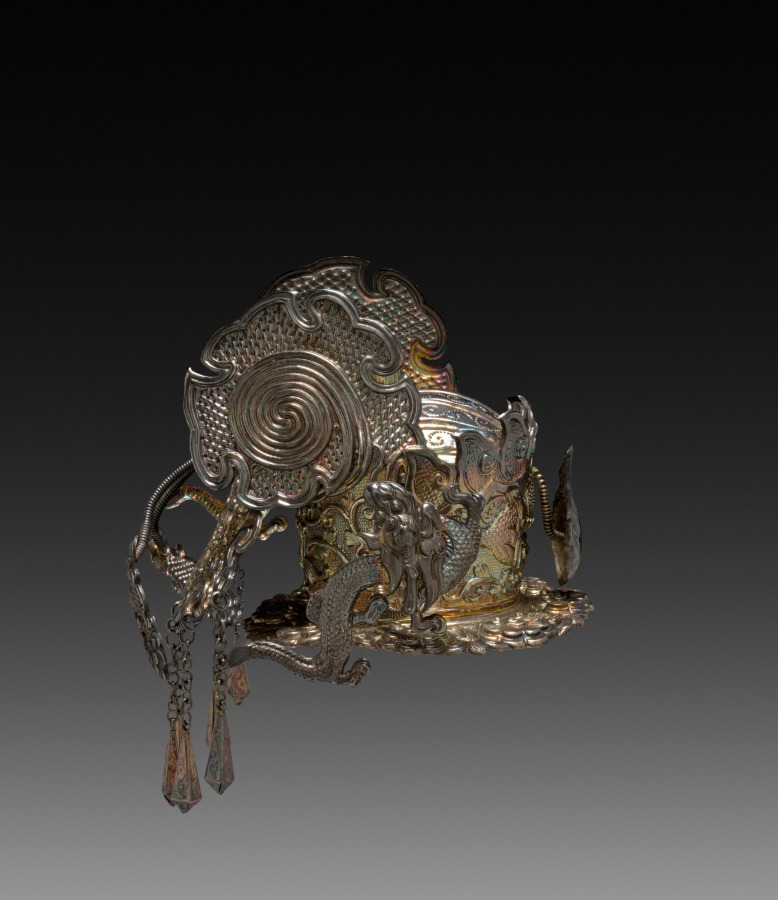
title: Model of a Hat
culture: China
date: early 1900s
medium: silver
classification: Metalwork